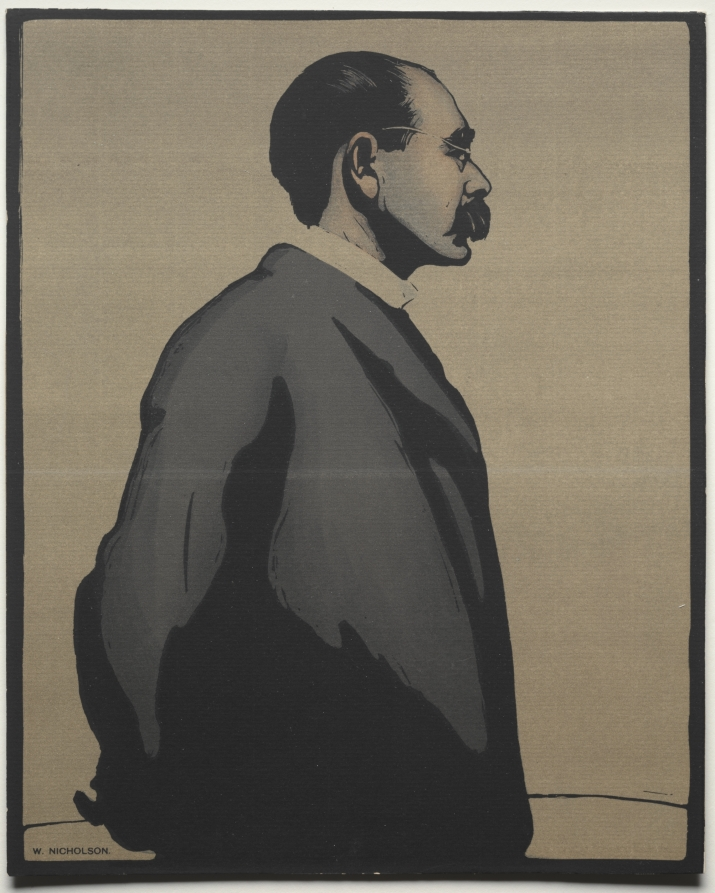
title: Rudyard Kipling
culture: England, early 20th Century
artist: William Nicholson (British, 1872–1949)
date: 1900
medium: woodcut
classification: Print